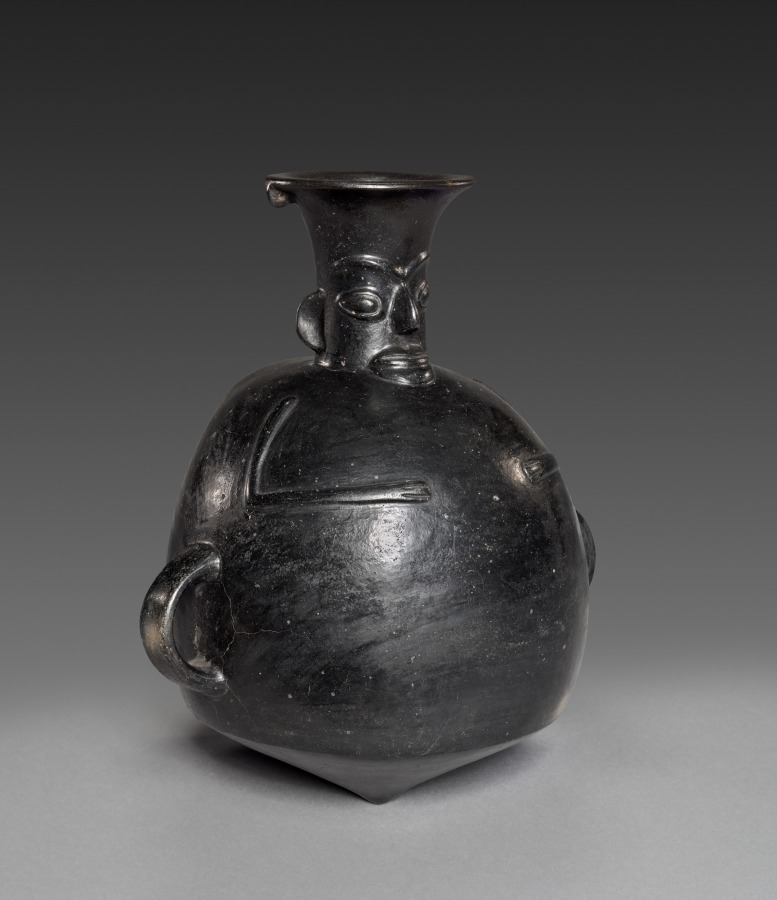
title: Hunchback Vessel (Aryballos)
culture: Central Andes (Peru), Chimú-Inka style, Late Horizon period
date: 1470–1521 (Thermoluminescence date, 1315–1615)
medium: ceramic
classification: Ceramic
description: This handsome vessel, along with the nearby double-chambered vessel, were made on the north coast after the Inka conquered the Chimú in the 1460s. Under Inka rule, many aspects of Chimú ceramic technology continued but new forms and subjects were introduced, such as the aryballos, a classic Inka vessel type. This example takes the form of a hunchback and may refer to the Inka predilection for employing hunchbacks as royal servants.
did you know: Hunchbacks seem to have functioned as servants in Inka royal palaces.